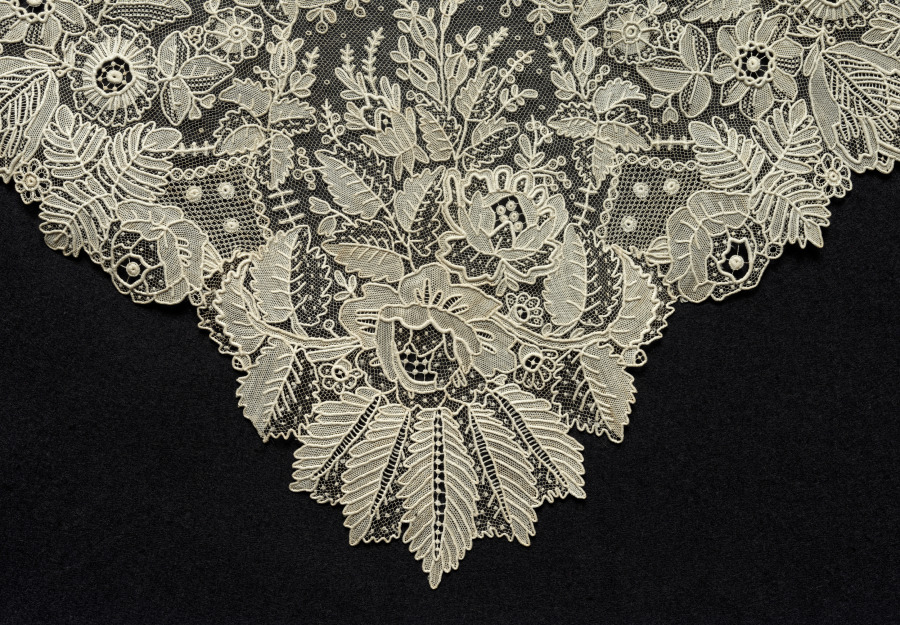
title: Lace Handkerchief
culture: Belgium, Brussels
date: 1800s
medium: Plain weave linen center; needle lace (point de gaze) border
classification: Lace